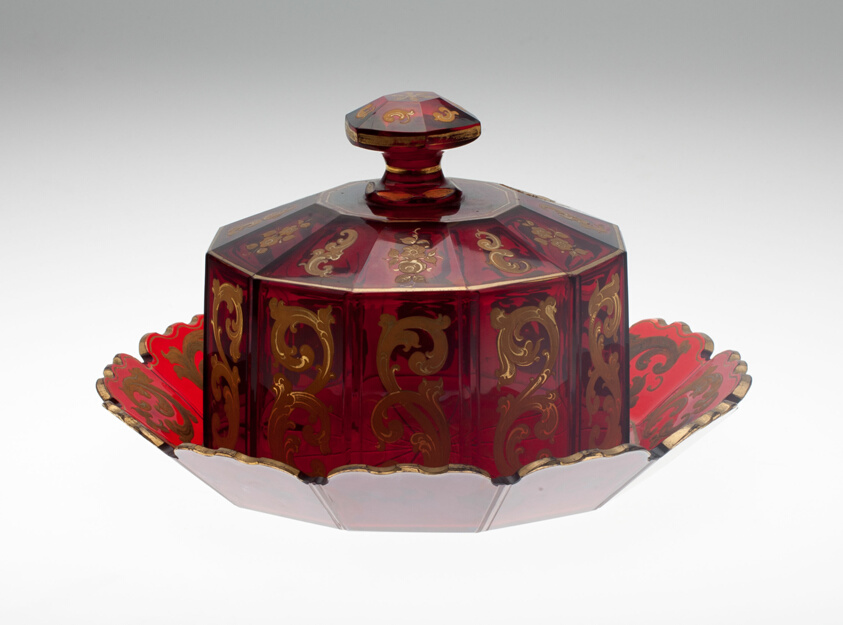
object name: Glass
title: Cheese Dish and Cover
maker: Bohemia, Czech Republic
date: 19th century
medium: Glass; cut, stained red and gilded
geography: Bohemia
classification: vessel for serving food; glass; dish (vessel); european decorative arts